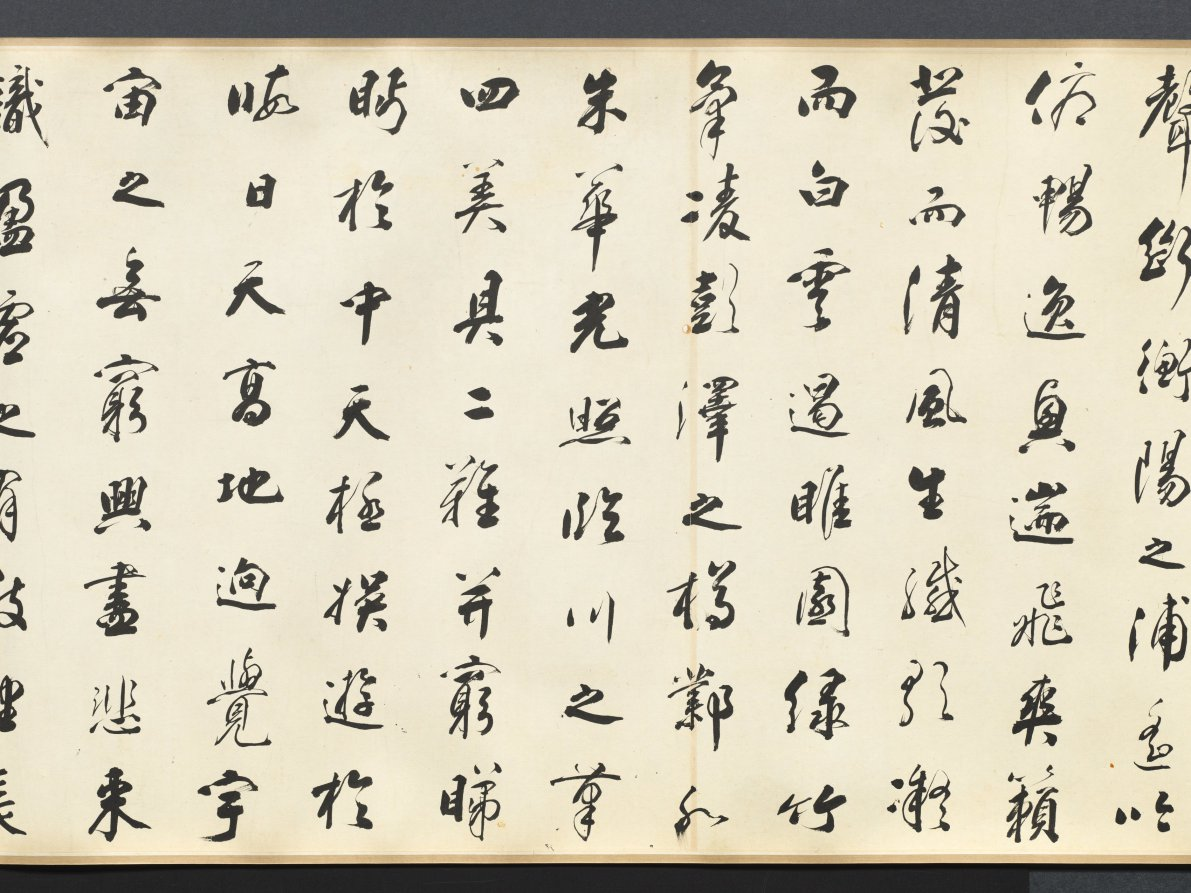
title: Calligraphy in Running Style based on Wang Bo's Essay on Tengwang Pavilion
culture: China, Changbai, Qing dynasty (1644-1911)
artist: Tiebao (Chinese, 1752–1824)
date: 1811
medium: handscroll, ink on paper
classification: Calligraphy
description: A member of the Donggo clan, Tiebao belonged to the Manchu Plain Yellow Banner army. As an official in the Qing court, he endured considerable vicissitude and his career was never smooth. Celebrated as a man of letters, he oversaw the publications of the Manchu military system as well as an anthology of poems by members of the imperial family and other Manchu dignitaries. In calligraphy, he was regarded as the equal of such eighteenth-century luminaries as Liu Yong (1720-1805) and Weng Fanggang (1733-1818). This handscroll is a work of his mature years and is exemplary of his disciplined and highly subtle approach to the art of calligraphy.